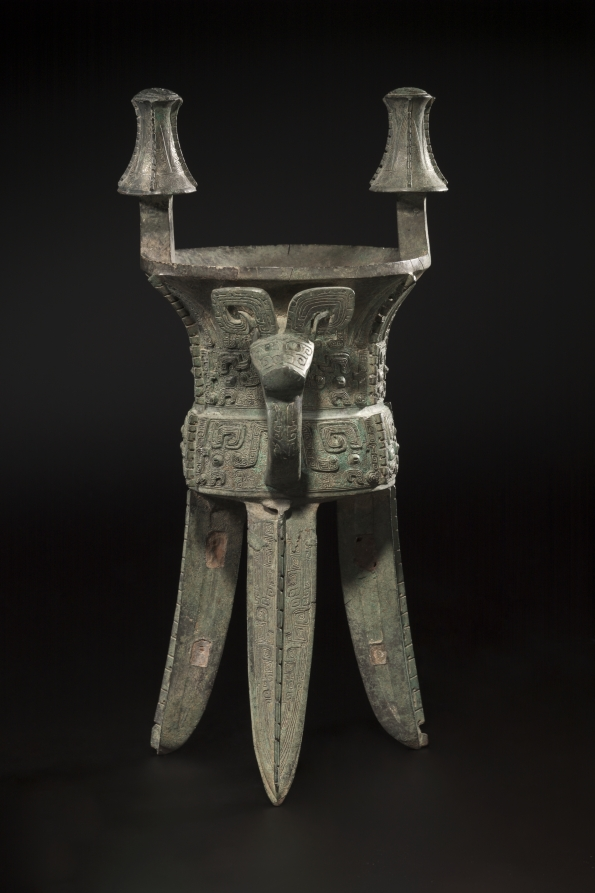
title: Wine Vessel (Jia)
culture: China, Shang dynasty (c. 1600–c. 1046 BCE), Anyang phase (c. 1250–1046 BCE)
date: c. 1250–1046 BCE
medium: bronze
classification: Metalwork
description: This large wine vessel (or jia) is among those very rare, monumental pieces uncovered from Anyang, the last royal capital of the Shang dynasty (c.1700–c.1100 BCE). Probably very few monumental bronze vessels were ever made; each of them must have cost a fortune and was used to designate high-ranking (often royal) status. Even fewer have survived. This wine vessel was used for the ancestral rites of the Shang. Its three splayed legs supported the cup over a fire, suggesting that the wine might be heated. Offering wine and food to their departed ancestors was an essential ritual practice performed by the Shang royalty and aristocracy. The Shang people believed that their ancestors were able to intercede with the high god to confer fruitful harvests and victories in battles. Their ritual actions involved communication with the supernatural realm (and this was further supported by the practice of divination with the use of a tortoise shell or a cattle shoulder blade). Here, the animal mask on the bronze vessel stares frontally at the viewer and serves symbolically as a messenger of communication with the ancestors. It conjures up the potency of mystery, whereas the static monumentality of the bronze vessel lends an air of dignified solemnity to the ritual ceremony.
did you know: Ancient bronze vessels are ritual and religious in nature, linked inextricably to political legitimization, and are source materials for Chinese historiography and traditional antiquarianism.